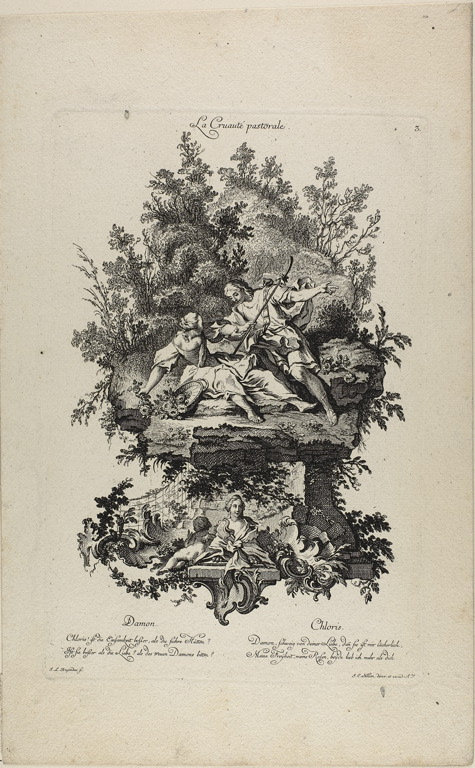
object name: Print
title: Pastoral Cruelty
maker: Johann Lorenz Rugendas I (German, 1730-1799); after Charles Eisen (French, 1720-1778)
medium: Etching on ivory laid paper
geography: Germany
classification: engraving; print; prints and drawing